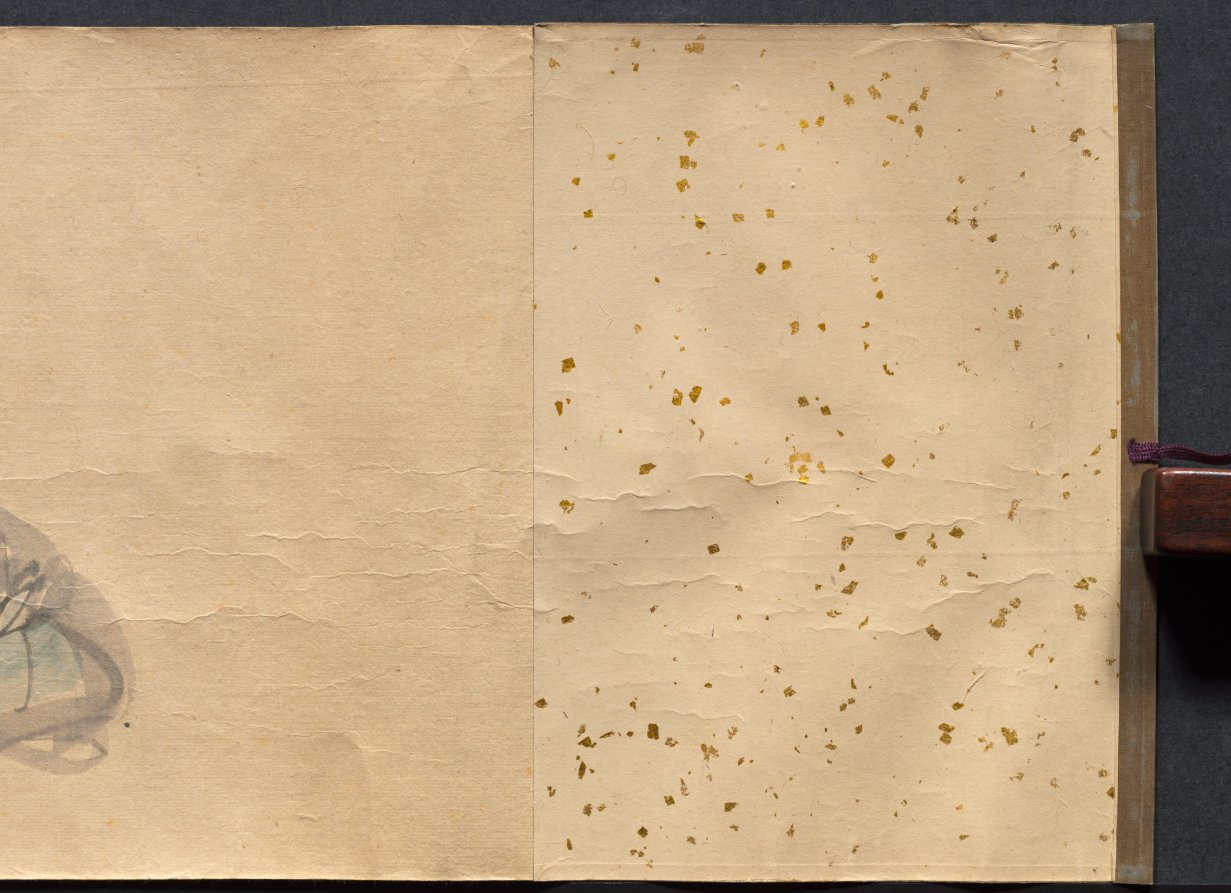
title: Festival Scenes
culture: Japan, Edo period (1615–1868)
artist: Suzuki Nanrei (Japanese, 1775–1844)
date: c. 1795–1844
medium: handscroll; ink and color on paper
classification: Painting